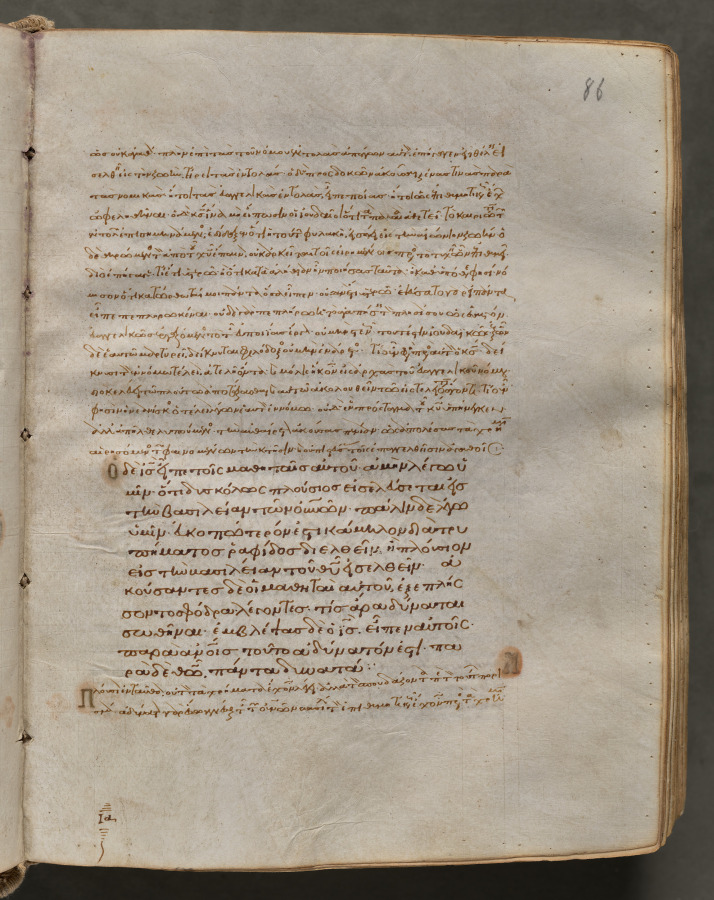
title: Text, folio 86 (recto), from a Gospel Book with Commentaries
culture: Byzantium, Constantinople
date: c. 1000–1100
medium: ink, tempera, and gold on vellum; leather binding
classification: Bound Volume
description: Each of the four gospels in this book opens on a page with brilliantly illuminated borders depicting the author of the text as well as birds-principally peacocks, symbols of the immortality of the soul-and fountains, representing the fountain of life and the salvation of the soul. This volume consists of 428 leaves with texts in Greek. Its level of sophistication suggests that it was probably written and decorated in a monastery in Constantinople.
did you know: Gospel Books were carried in procession through Byzantine churches.